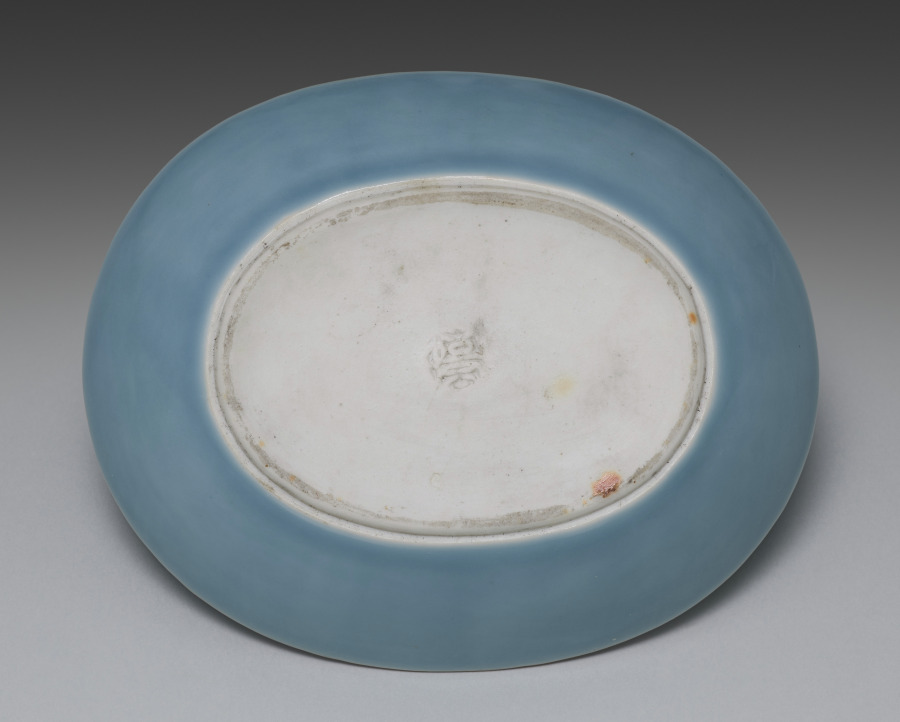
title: Dish from Dishes with Shells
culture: Japan, Taishō period (1912–26)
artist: Seifū Yohei IV (Japanese, 1872–1951)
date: 1914–46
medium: One from a set of five dishes; porcelain with blue glaze, iron oxide, and molded design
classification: Ceramic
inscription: 清風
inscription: 清風造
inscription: 清風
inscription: 成山清風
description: Yohei IV chose an aquatic theme for this set of five mukōzuke, side dishes. He added an iron oxide rim and used a concentrated blue glaze on both the interior and exterior. The glaze, named on the box lid, is his father’s “evening moon” (tsukiyoi) color. The conch in relief takes up the entire bottom of the dish. Up the sides are two snails on one end and on the other a scallop. This results in a boldly graphic, less realistic effect.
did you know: This set of dishes, mukōzuke, could be used for serving small side dishes at a tea gathering.